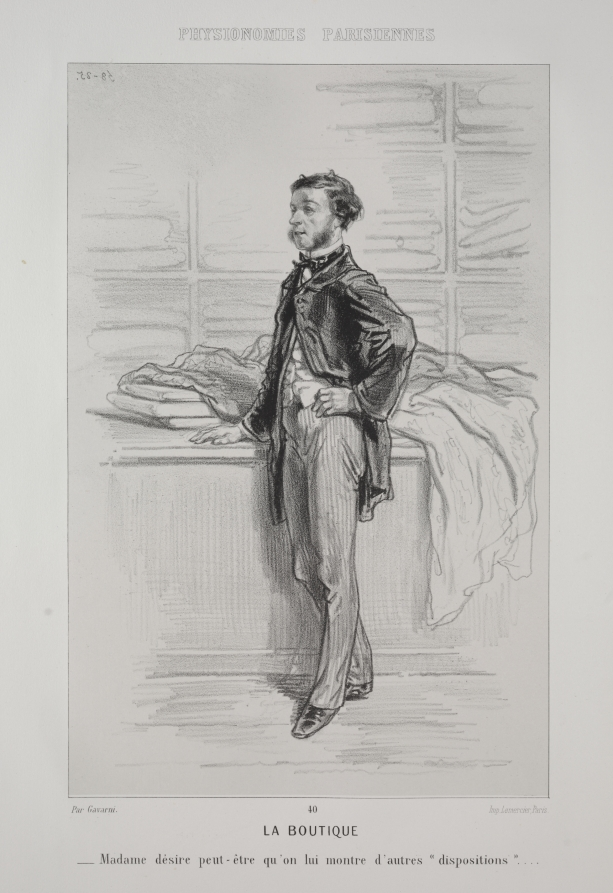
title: La Boutique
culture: France, 19th century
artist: Paul Gavarni (French, 1804–1866)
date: c. 1858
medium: lithograph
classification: Print